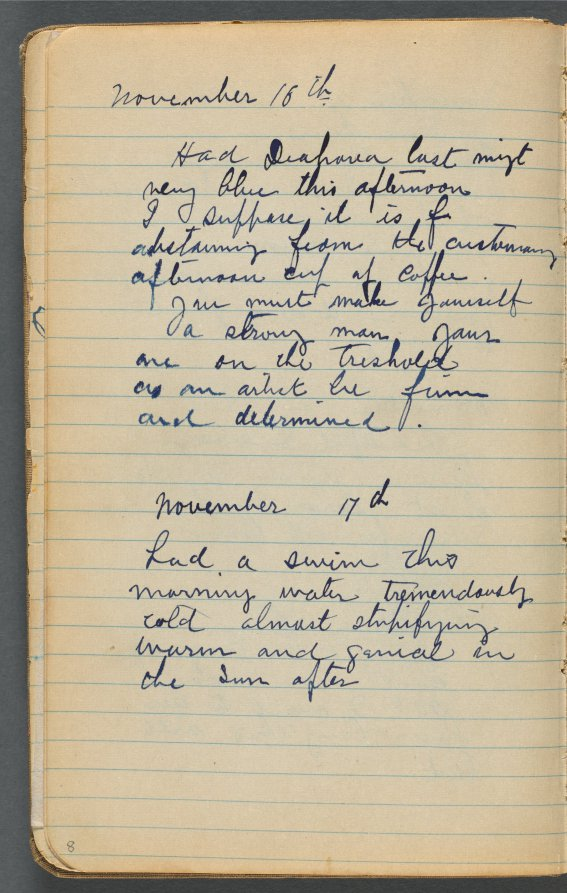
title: Sketchbook, page 008: Notes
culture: America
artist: Maurice Prendergast (American, born Newfoundland [now Canada], 1858–1924)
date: 1905–10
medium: graphite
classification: Bound Volume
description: This sketchbook contains 69 pages of drawings, a diary largely devoted to the state of the artist's health, and a three-page discourse on the nature of genius and ideas.